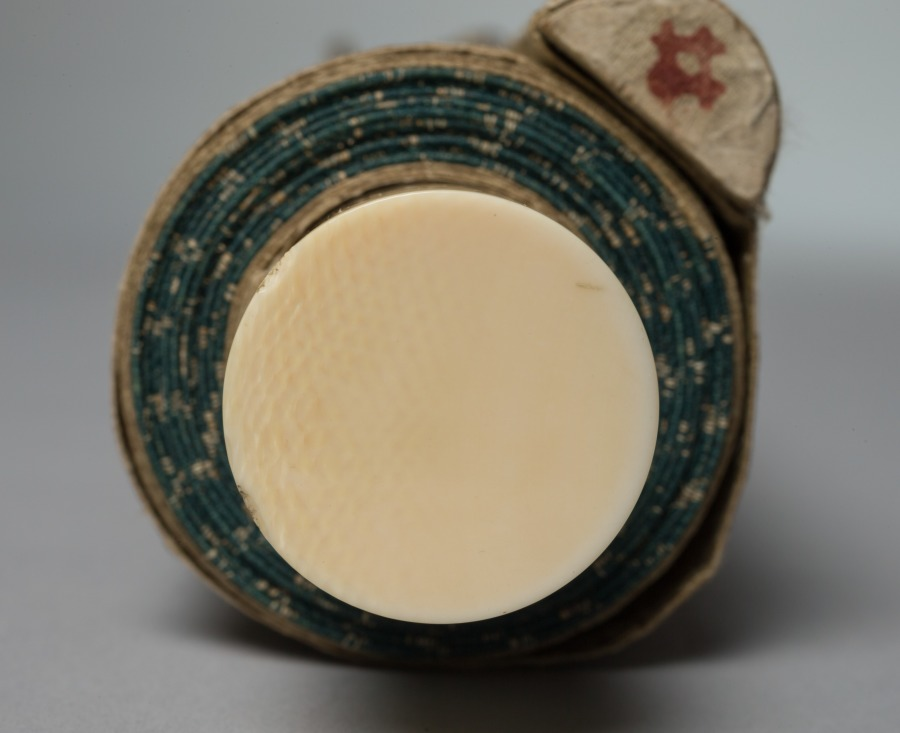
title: Courtesan and Attendants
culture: Japan, Edo period (1615–1868)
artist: attributed to Engetsudō (Japanese)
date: c. 1748–51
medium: hanging scroll; ink and color on paper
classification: Painting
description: The courtesan wears a pair of tall, lacquered wooden clogs and heavy robes, indicating it is winter. The elaborate span of her tortoiseshell comb in her fashionable coiffure enhances her glamorous appearance. Her blue-and-white striped obi is tied in a loose bow in front, typical for her profession. The round, stylized cherry blossom crest of her "house" (brothel), partially visible on her shoulder just above the shawl, also appears on the robes of her two attendants (kamuro). The attendants hold shuttlecocks, used in a game associated with New Year celebrations. One girl stares out at the viewer; the other looks back. The frontal view of the attendant’s face is somewhat rare in ukiyo-e painting and prints.